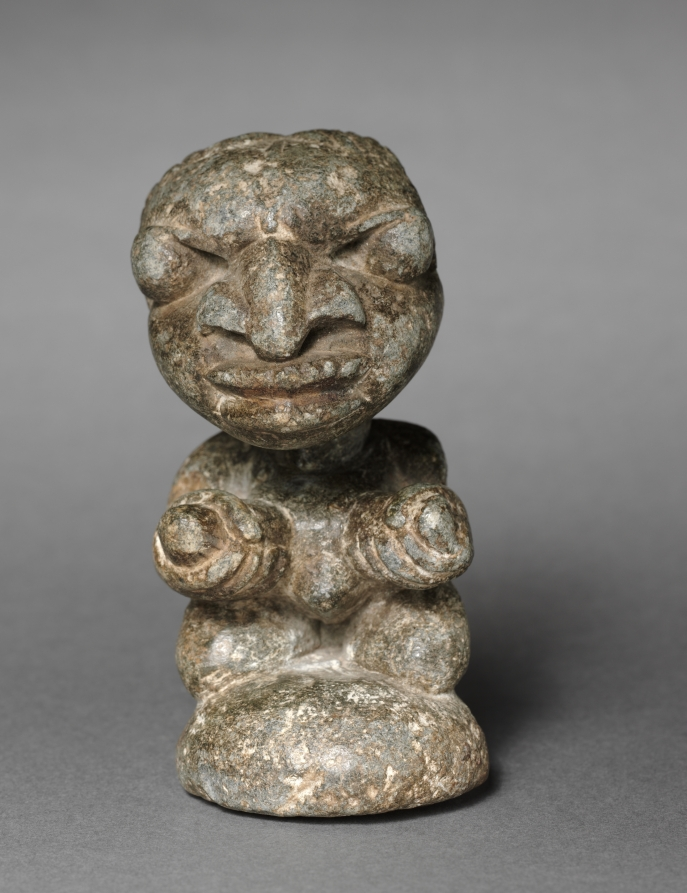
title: Female Figure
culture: Africa, West Africa, Sierra Leone, Sherbro-style maker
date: 1500s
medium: soapstone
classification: Sculpture